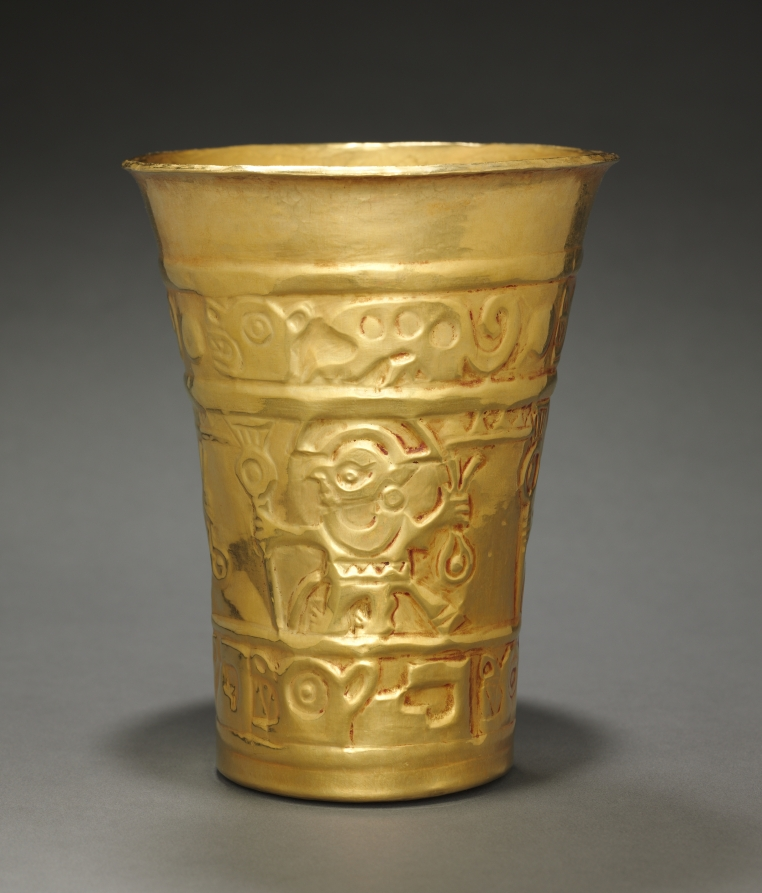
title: Beaker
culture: Peru, North Coast, Sicán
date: c. 800–1370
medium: hammered and embossed gold alloy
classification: Metalwork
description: Profile figures are unusual in Sicán metal beakers. The presence of such figures is one reason the museum is undertaking research to determine whether this vessel is authentic.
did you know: Embossed in the central band of this cup are warriors carrying clubs and slings.